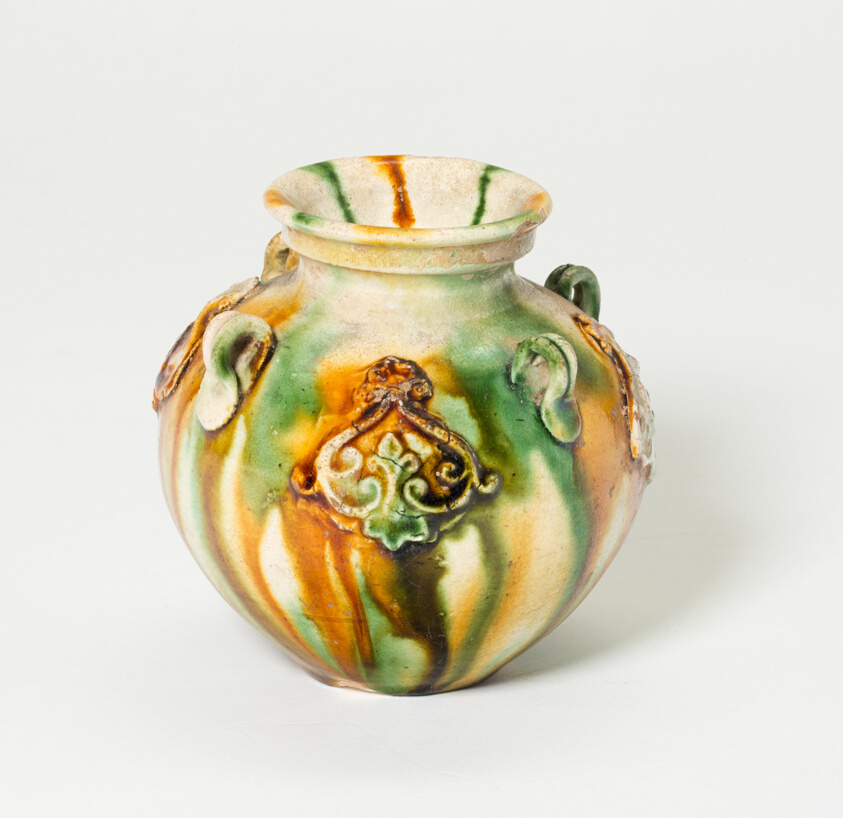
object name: Vessel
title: Jar with Loop-Handles and Medallions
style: Chinese (culture or style)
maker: China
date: Tang dynasty (618–907), first half of 8th century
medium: Earthenware with three-color (sancai) lead glazes and underglaze molded decoration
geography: China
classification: earthenware; asian art; ceramics; vessel